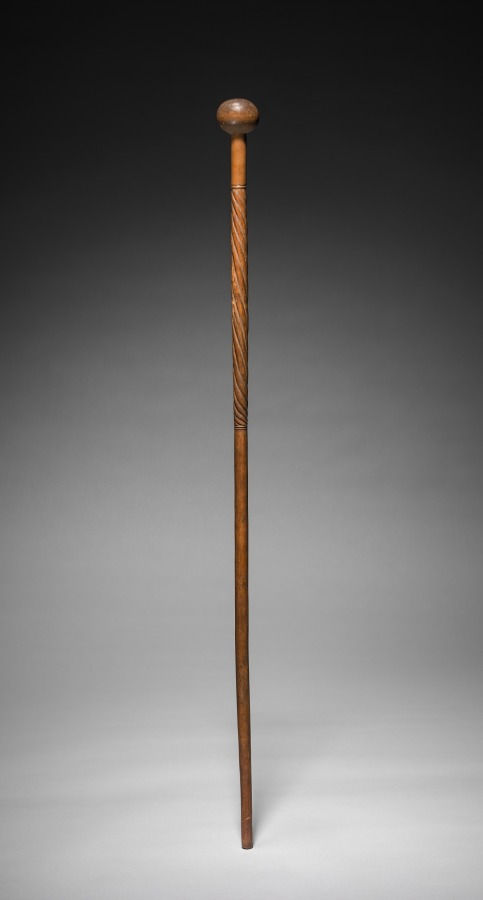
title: Baton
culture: Africa, unknown maker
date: c. 1875–1925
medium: wood, ivory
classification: Implements